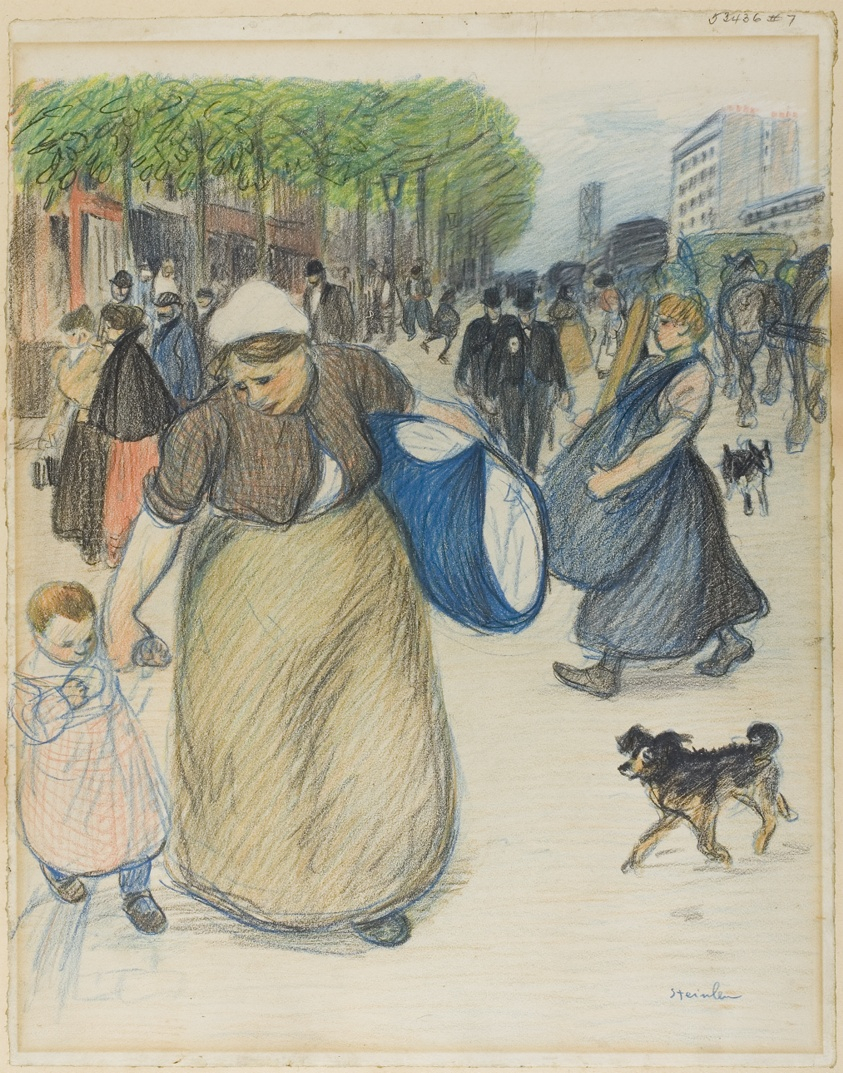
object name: Drawing and Watercolor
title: Street Scene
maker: Théophile-Alexandre Steinlen; French, born Switzerland, 1859-1923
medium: Colored crayons with incising on ivory wove paper, laid down on wood pulp board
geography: France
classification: crayon; drawings (visual works); prints and drawing